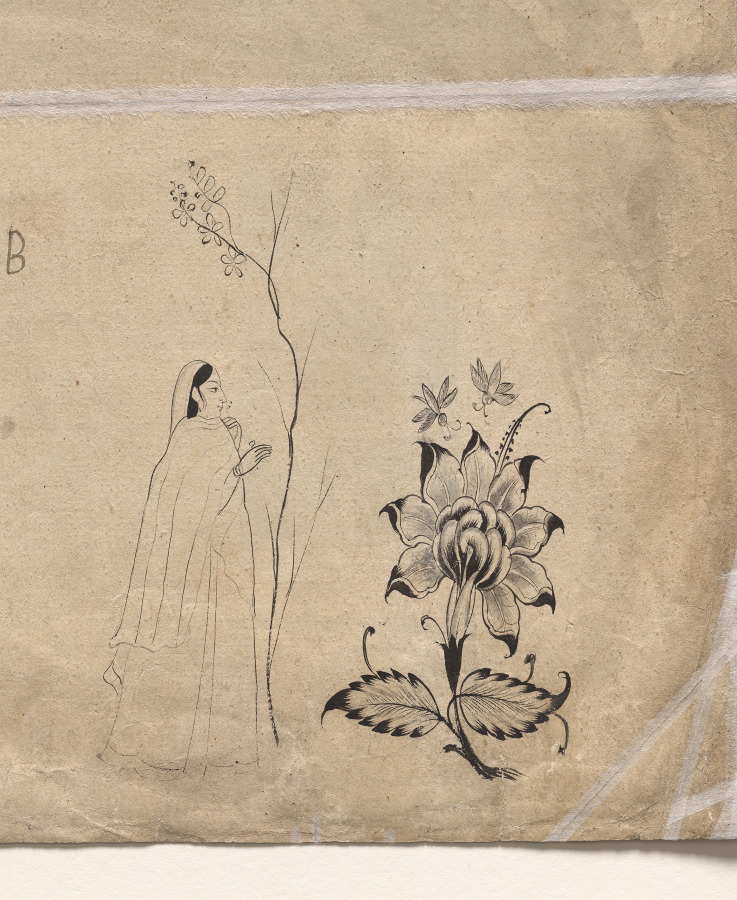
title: Two Elephants Fighting in a Courtyard Before Muhammad Shah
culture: India, Guler school, 18th century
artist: attributed to Nainsukh (Indian, 1710–1778)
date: c. 1730–40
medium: Gum tempera and ink on paper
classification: Painting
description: The Mughal emperor responsible for a revival of courtly arts and pastimes was Muhammad Shah (reigned 1719–48). This painting was made by an artist from a small kingdom in the western Himalayas who stayed at the Mughal court in Delhi and painted scenes of his experiences. Like his predecessors, Muhammad Shah enjoyed watching elephant fights. He is shown in his window of public audience, marked by a golden carpet, smoking a hookah. Women from his harem can be seen looking on from behind painted screens. Two pairs of men hold fire brands and spears to prevent the elephants from running off and to keep them under control. The intensity of the fight—captured at a moment when one mahout, or elephant trainer, has dropped his goad and is about to jump off—is augmented by the dense colors and forms in contrast to the otherwise pale planes, balanced only by the strip of palace windows.